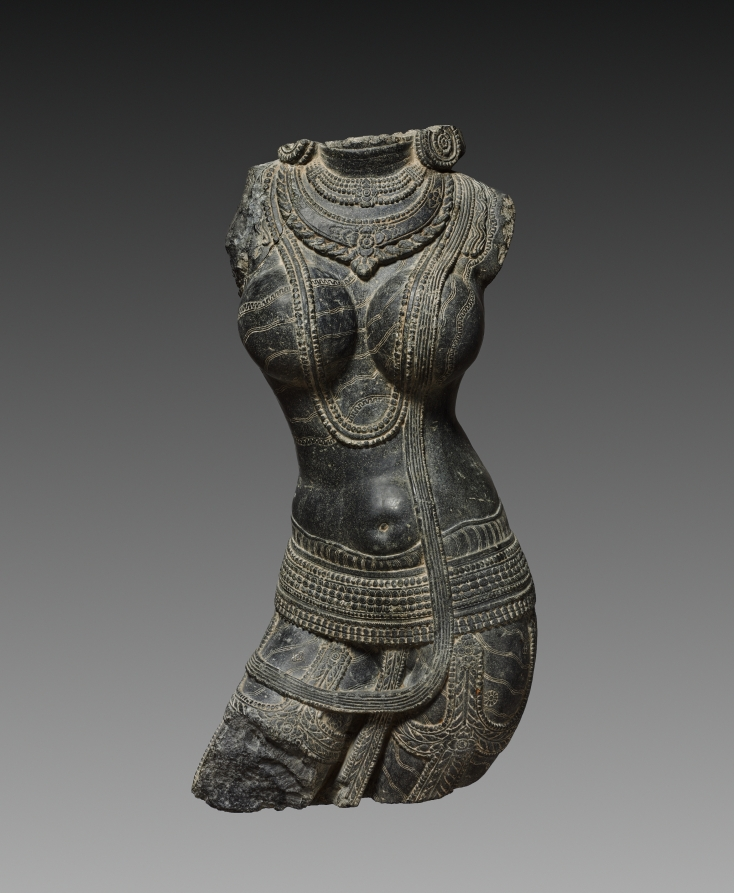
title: Female torso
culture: Northeastern India, Pala dynasty (730-1197)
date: 1000s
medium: black chlorite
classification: Sculpture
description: This life-size sculpture of a female figure was likely installed by a doorway or in an exterior niche of a Buddhist temple. Throughout the history of Indian art, voluptuous female figures have adorned Buddhist sanctuaries. Embodying the Indian ideal of female beauty, the form of the young mother with full breasts of milk personifies abundance, nourishment, and productivity—ideas that were considered auspicious and life affirming. Her copious jewels and valuable textiles also visually relate that the good karmic actions of venerating the Buddha and following his teachings will result in abundant good fortune.